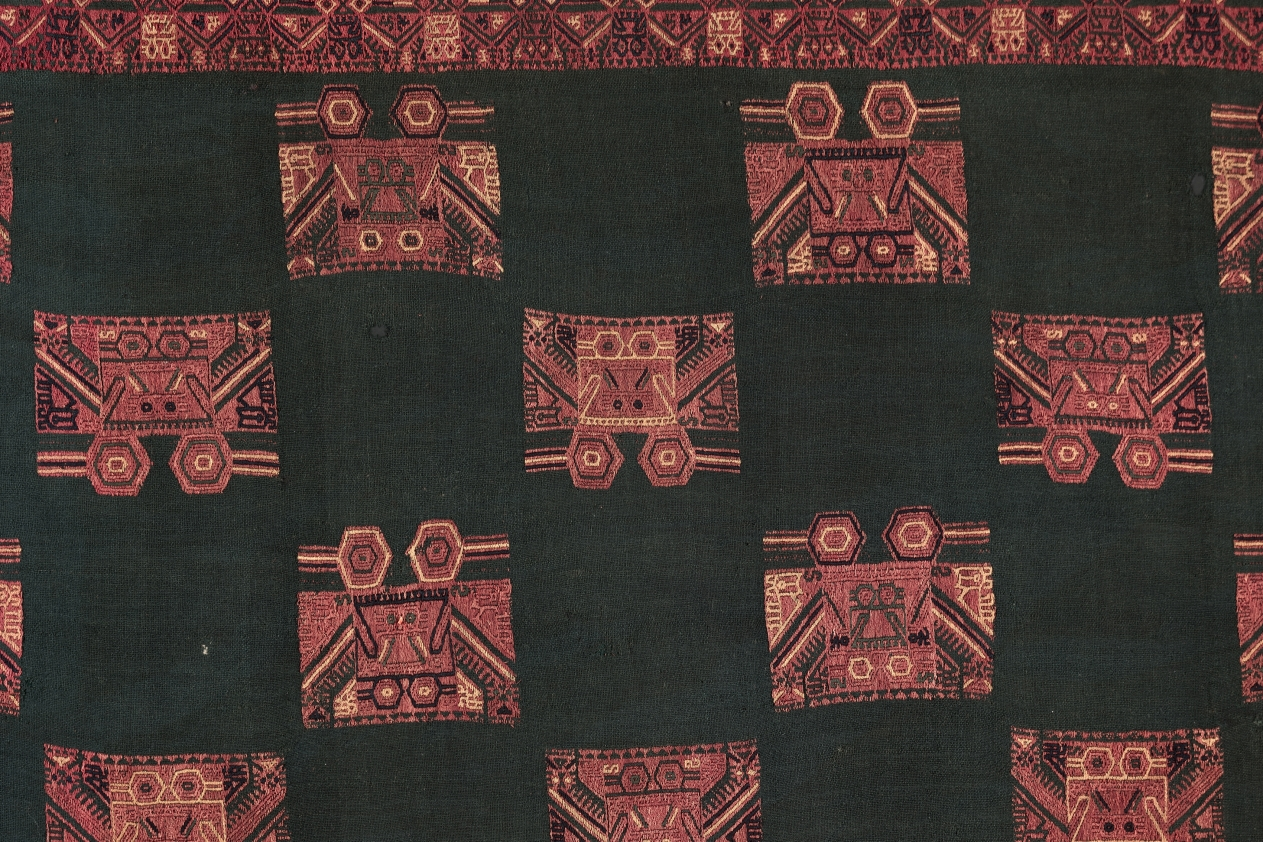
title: Mantle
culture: Peru, South Coast, Paracas (Cavernas) style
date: c. 300 BCE–200 CE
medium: camelid fiber: plain weave with embroidery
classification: Textile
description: Buried in shaft-tombs, or rectangular sunken chambers, the Paracas dead were wrapped in layers of cloth and accompanied by pottery, food, and other offerings. The dry environment of the Paracas Peninsula helped preserve many of these textiles, including richly ornamented garments buried with important individuals. This mantle, probably worn like a cloak, relates closely to the tunic (CMA 1946.227) and long headband (CMA 1946.228) due to their shared imagery. Its double-headed bird motifs— embroidered in vivid red, blue, yellow, and green yarns—likely had symbolic significance, although the specific meaning remains unknown.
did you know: The profusion and decoration of textiles in Paracas burials shows the value placed on cloth.